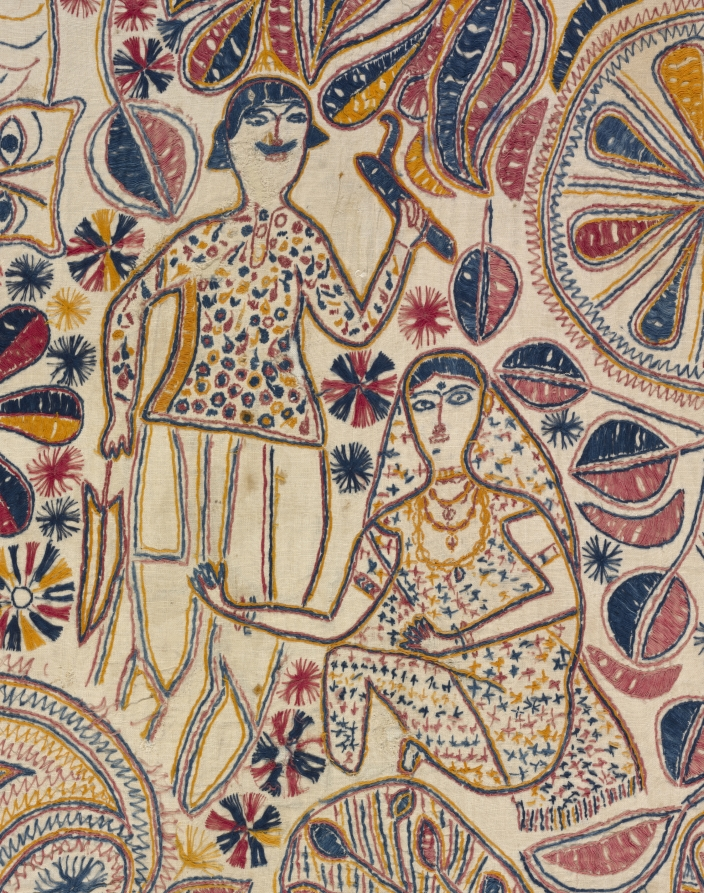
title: Kantha (Ceremonial Quilt)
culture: India, East Bengal, 19th century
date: 1800s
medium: embroidery: cotton thread on cotton tabby ground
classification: Embroidery